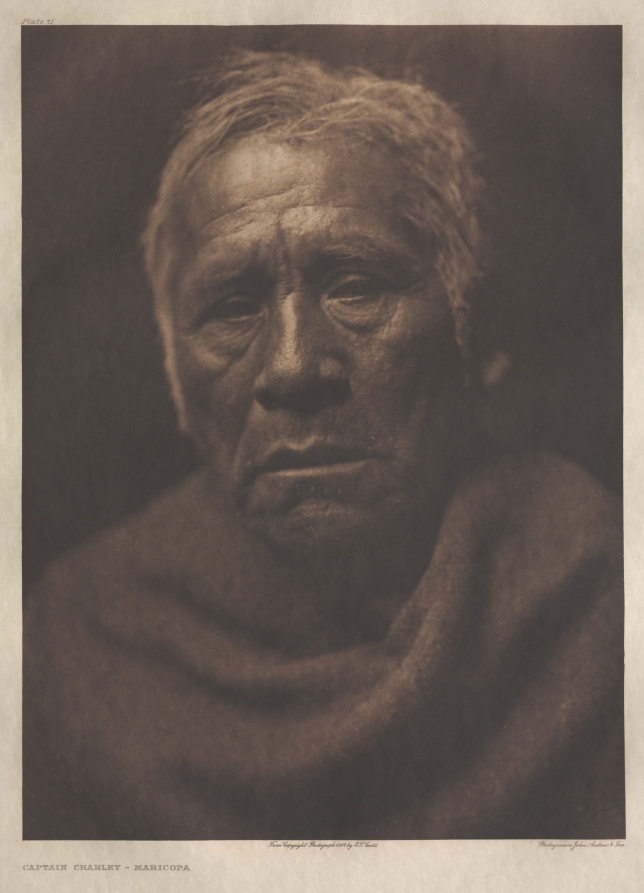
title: Portfolio II, Plate 71: Captain Charley - Maricopa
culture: America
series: The North American Indian: being a series of Portfolios picturing and describing the Indians of the United States, the Dominion of Canada, and Alaska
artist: Edward S. Curtis (American, 1868–1952)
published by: The University Press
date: 1903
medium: photogravure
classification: Portfolio